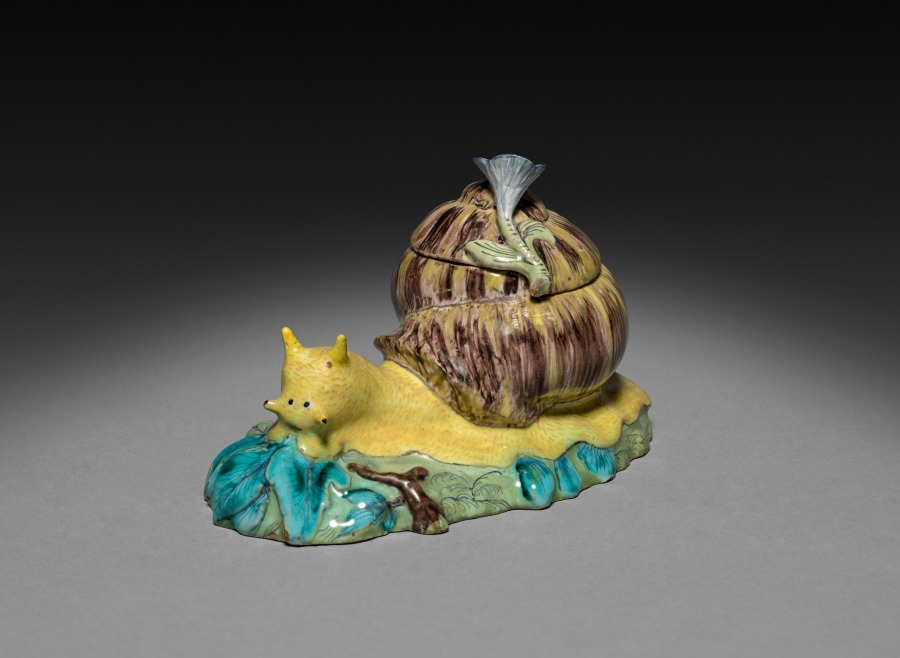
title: Covered Box in the Form of a Snail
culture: France, 18th century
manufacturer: Strasbourg Factory (France)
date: c. 1750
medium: faience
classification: Ceramic